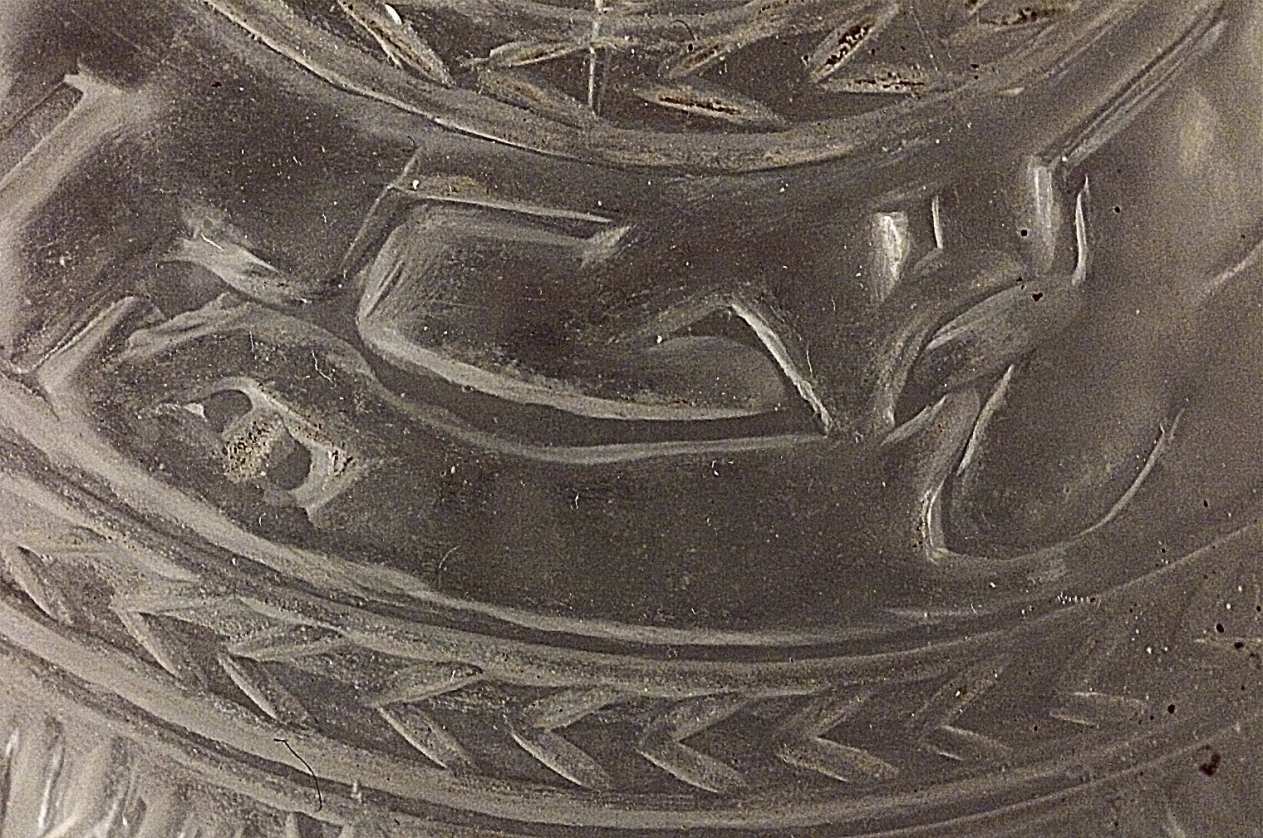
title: Hookah Bowl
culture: India, Mughal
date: 1700s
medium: glass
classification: Glass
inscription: Inscription in Farsi, on body: Even if live charcoal is placed on its head/ The hookah, a teacher of etiquette,/ will not respond unless drawn upon;/ Thus one can learn from its manners of refinement.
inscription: Inscription in Farsi, on shoulder: In the name of Allah the clement and merciful is the key to the wise treasure.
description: The inscription around the body of the base speaks to the use of the hookah in the decadent life of the Mughal court. The hookah is commended for being a proper, refined servant who will not “respond unless drawn upon” or, produce water bubbles when smoke is drawn through the hose. Undoubtedly the witty, poetic allusions would have been appreciated at banquets and other courtly gatherings. The use of wheel-cut glass for this hookah base may have been influenced by English glass and lead crystal that was exported to India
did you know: Around the top of this hookah bowl are incised the opening two lines from the Khamsa (Quintet) of the celebrated Persian poet Nizami (1141–1209).